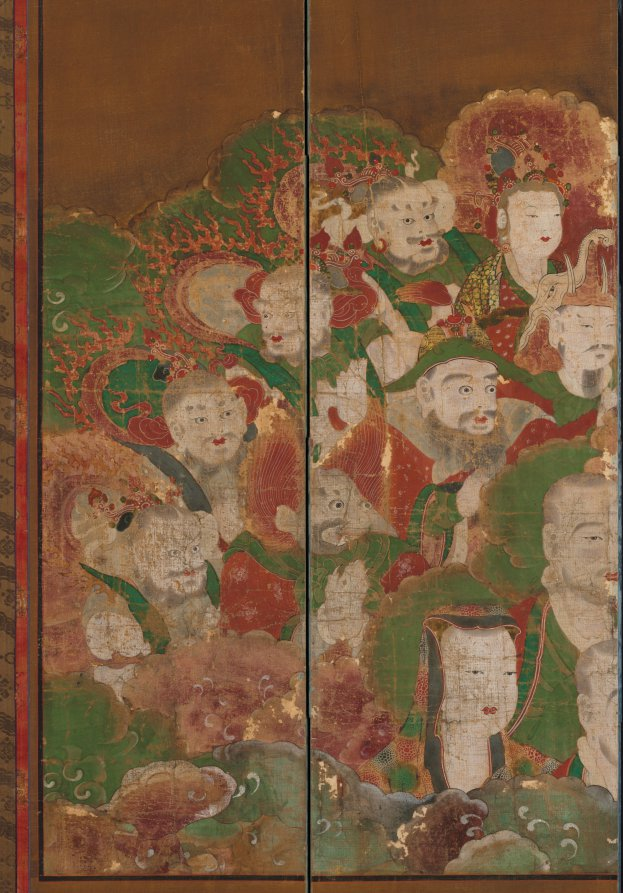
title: Buddhist Deities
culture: Korea, Joseon dynasty (1392–1910)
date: 1700s–1800s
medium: Four-panel folding screen; ink and color on silk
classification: Painting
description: This painting is a fragment of a much larger banner painting, now preserved by mounting on a four-panel continuous folding screen. On the back are Buddhist sutra pages, with text written in gold ink on indigo dyed paper.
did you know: This painting is a fragment of a much larger banner painting.